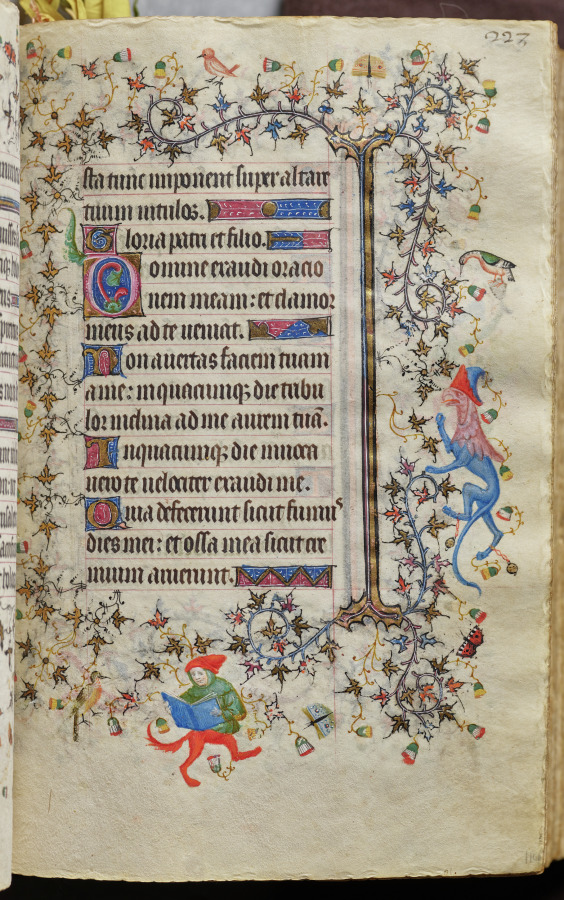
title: Hours of Charles the Noble, King of Navarre (1361-1425): fol. 114r, Text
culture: France, Paris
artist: Master of the Brussels Initials and Associates (French)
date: c. 1405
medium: ink, tempera, and gold on vellum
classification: Bound Volume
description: This precious volume was obviously highly prized by its owner, the French-born King of Navarre, who had his coat of arms painted on no less than twenty folios. Rather than directly commissioning this manuscript from a specific workshop, it seems that Charles the Noble acquired his book of hours -- perhaps ready-made for the luxury market -- while on a trip to Paris in 1404-05. A collaborative effort, six painting styles are evidenced within the pages of this codex, those of two Italians, two Frenchmen, and two Netherlanders. The painter who was responsible for the planning and decoration of the book, and who produced seventeen of the large miniatures, was a Bolognese artist known as the Master of the Brussels Initials. His principal assistant, responsible for most of the borders, was a Florentine who signed his name "Zecho" da Firenze on folio 208 verso.